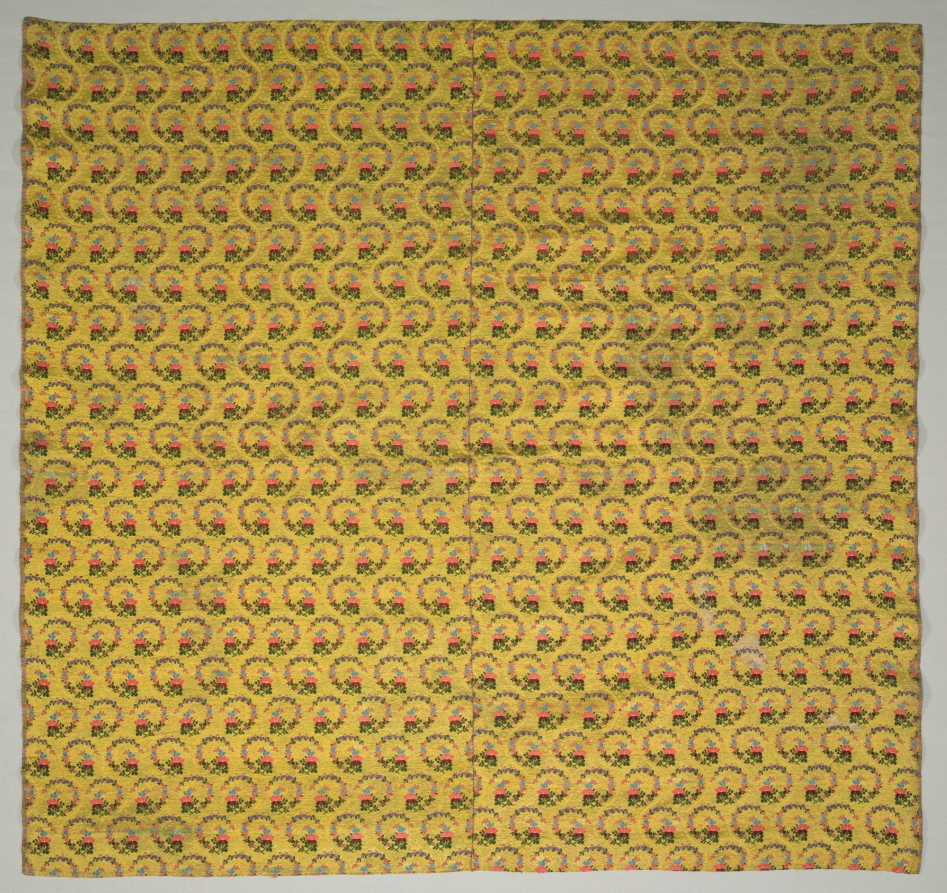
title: Two Loom Widths Sewn Together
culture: Iran, 19th - early 20th century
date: 1800s - early 1900s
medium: compound weave with silk and metal tread weft brocade; loom width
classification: Textile